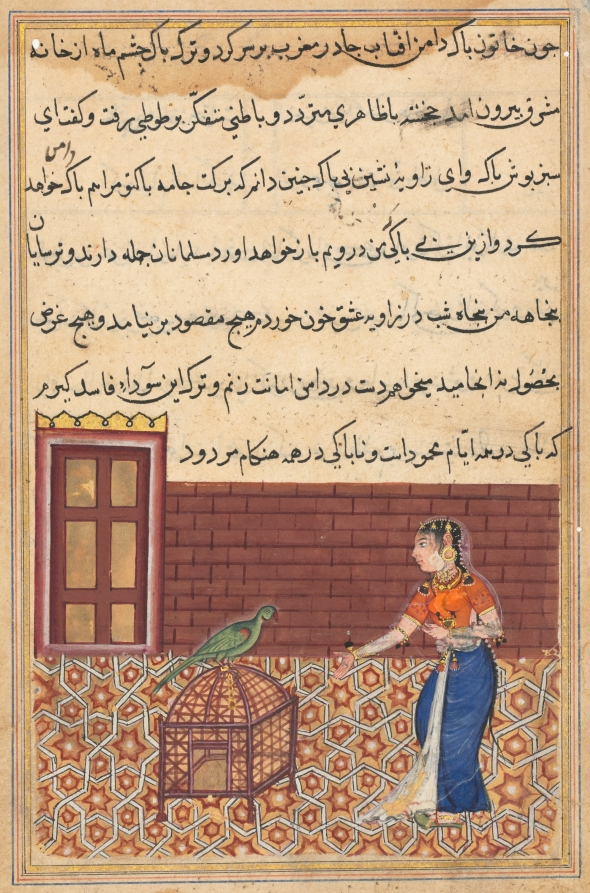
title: The parrot addresses Khujasta at the beginning of the fifty-first night, from a Tuti-nama (Tales of a Parrot): Fifty-first Night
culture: Mughal India, court of Akbar (reigned 1556–1605)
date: c. 1560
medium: gum tempera, ink, and gold on paper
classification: Painting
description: As the sun sets on the fifty-first of fifty-two nights, Khujasta prepares to leave to meet her lover. She is stopped by Tuti, the shrewd, talking parrot, who tells her a story about the cruel King Bahram and the misfortune that befell his vizier’s daughter.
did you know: A thin, gold chain keeps Tuti anchored to his cage.